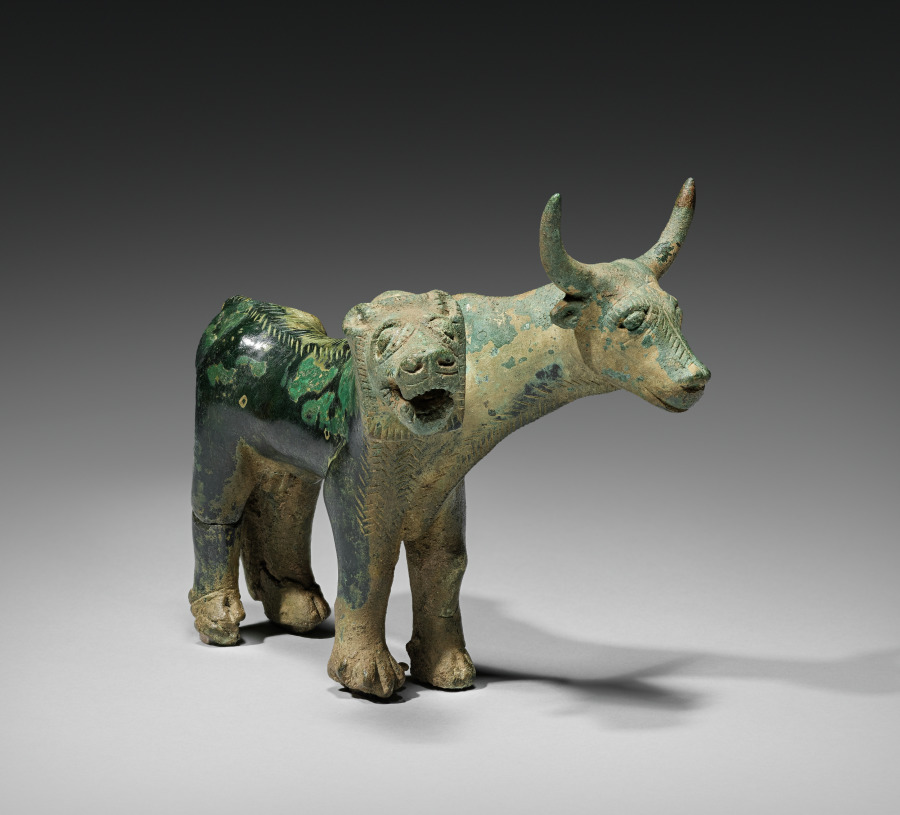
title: Composite Lion and Bull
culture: Iran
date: 1500–1000 BCE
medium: bronze, cast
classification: Sculpture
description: Combining the strength of the lion and the fertility of the bull, this creature must have served as an object of worship in a temple or shrine.